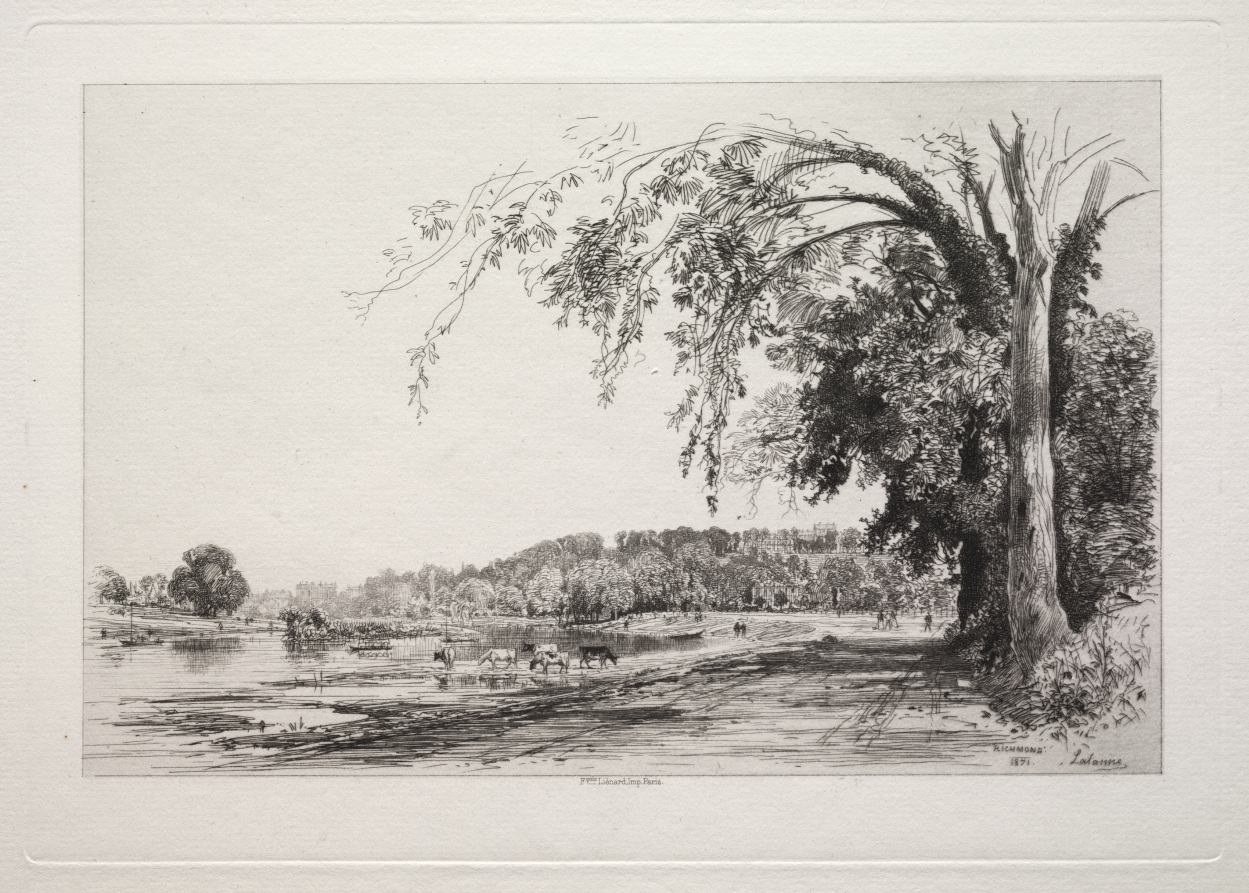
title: Richmond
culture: France, 19th century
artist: Maxime Lalanne (French, 1827–1886)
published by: Françoise Lienard, Paris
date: 1871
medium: etching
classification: Print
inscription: lower margin, in graphite: 14 Examples of Modern Etching 1875 Richmond A306